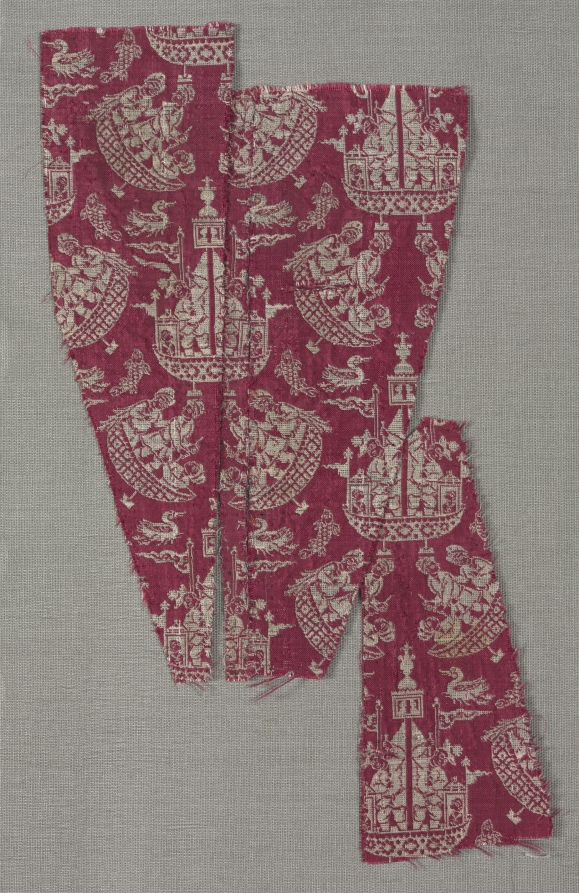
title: Fragment with maritime scene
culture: Iran, Safavid period (1501–1722)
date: late 1600s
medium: silk and silver-metal thread: double cloth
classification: Textile